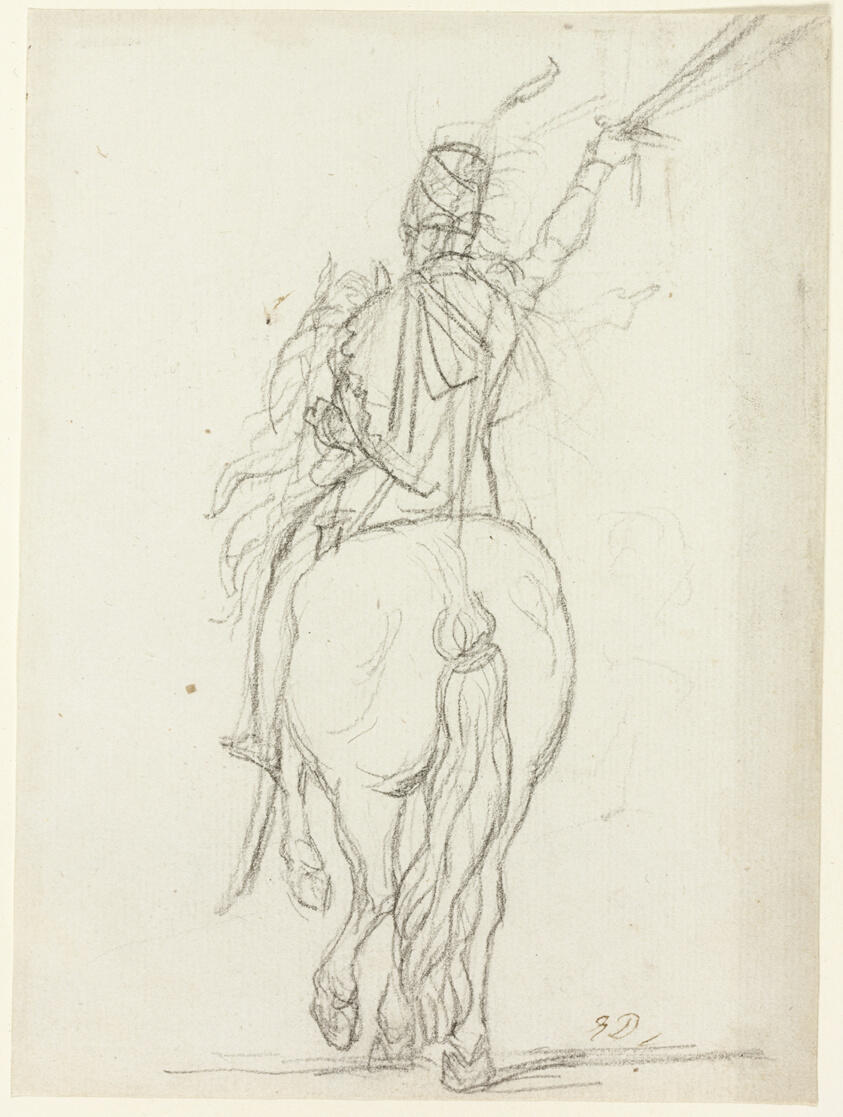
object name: Drawing and Watercolor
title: Mounted Officer from the Back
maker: Jacques-Louis David; French, 1748-1825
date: c. 1810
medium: Black chalk on ivory laid paper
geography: France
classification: chalk; drawings (visual works); prints and drawing